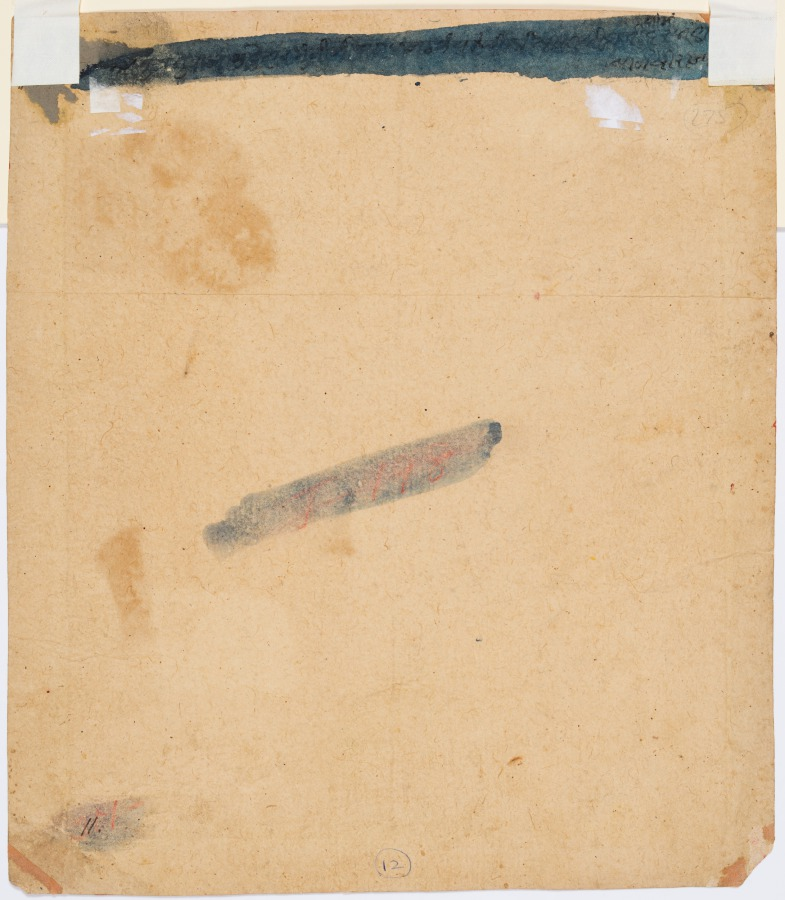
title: A Rathor Noble Visiting a Holy Man at a Vishnu Shrine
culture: Northwestern India, Rajasthan, Marwar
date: c. 1760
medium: gum tempera and gold on paper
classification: Painting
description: A naked Jain monk sits before a Rajput noble, whose triple mark on the brow indicate that he is a follower of the Hindu god Shiva. Behind them is a temple dedicated to Vishnu. In a visual statement of ecumenism, all three religions appear to coexist peacefully in the kingdom. The noble has set down his sword and shield and enjoys a hookah while listening to the discourse of the monk.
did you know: Monks belonging to the Digambara (Sky-clad) sect of Jainism renounce the comforts of clothing.